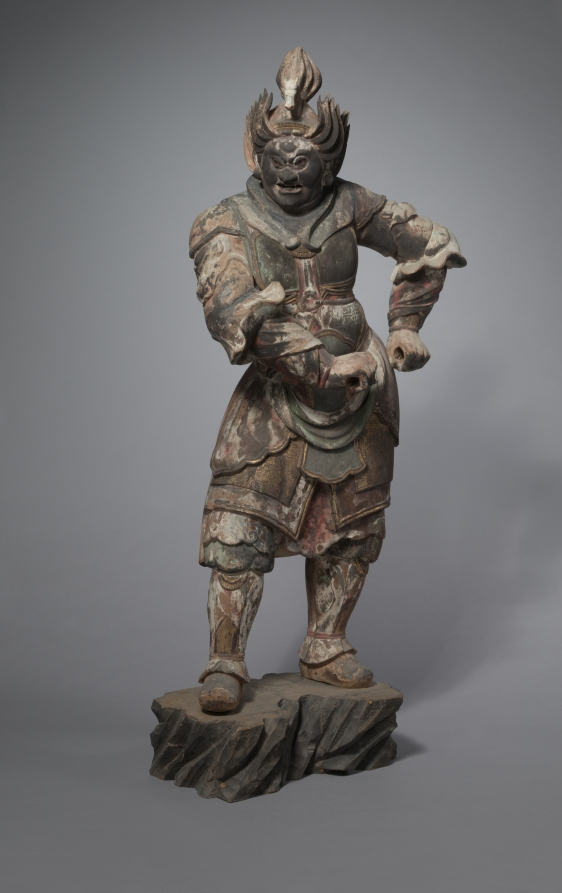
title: A Heavenly General (One of the Junishinshō)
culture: Japan, Kamakura period (1185–1333)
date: 1200s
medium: Wood with lacquer, color, gold, and crystal eyes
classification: Sculpture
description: This dynamic figure was originally part of a set of Twelve Divine Generals (Junishinshō) that stood in a Japanese Buddhist temple hall, protecting the central icon of Yakushi Nyorai, the Healing Buddha. This sculpture was constructed from many pieces of thinly carved wood joined together with pins, then covered with hemp cloth and lacquer paste, and finally decorated with pigments. Eyes made of crystal, with painted details, finish the composition. The proliferation of religious sites throughout Japan in the 1200s, particularly in Kyoto, kept sculptors’ studios busy creating religious icons.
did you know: A fierce facial expression warns us not to cross this protective deity.